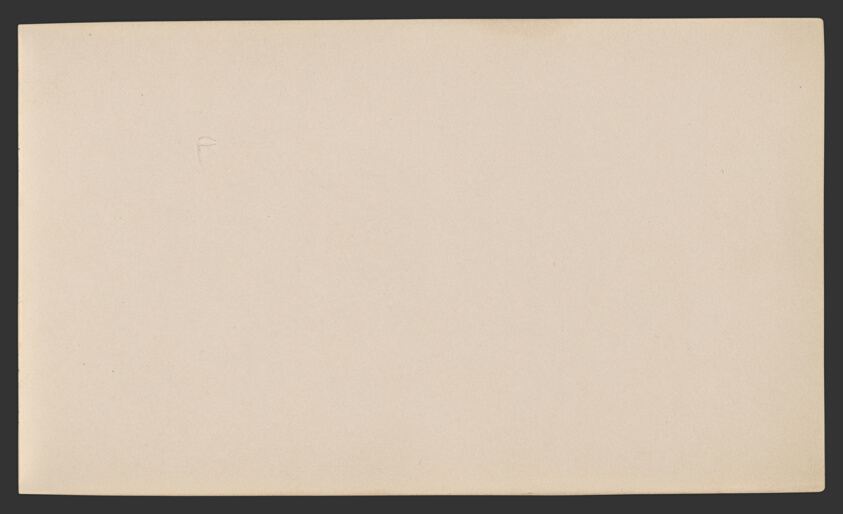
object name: Drawing and Watercolor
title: Sketchbook No. 2 (L'Estaque)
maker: Paul Cézanne; French, 1839-1906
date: 1875–86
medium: Graphite and pen and ink drawings on paper, bound into a book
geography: France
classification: sketchbook; graphite; prints and drawing; paper